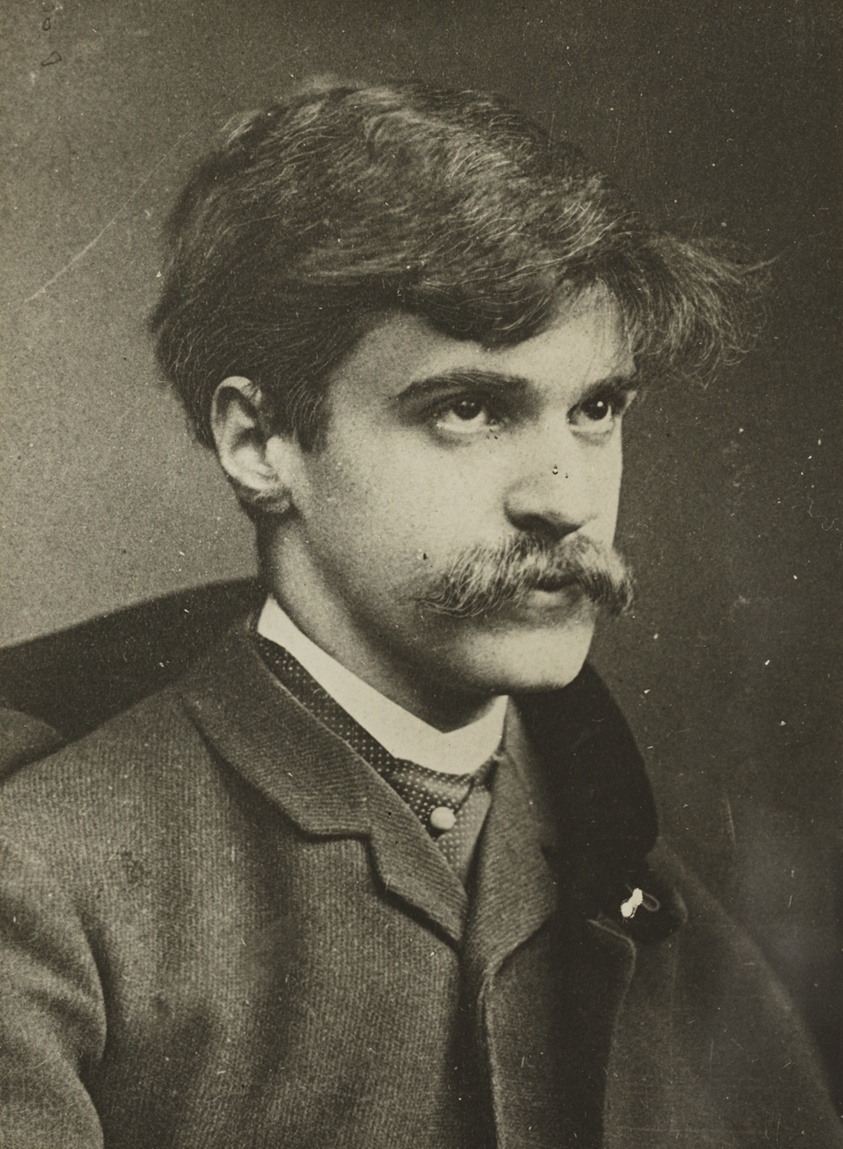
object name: Photograph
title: Self-Portrait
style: 19th century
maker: Alfred Stieglitz (American, 1864–1946)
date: 1894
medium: Lantern slide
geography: United States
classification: lantern slide (glass); negative/transparency; photography; photograph